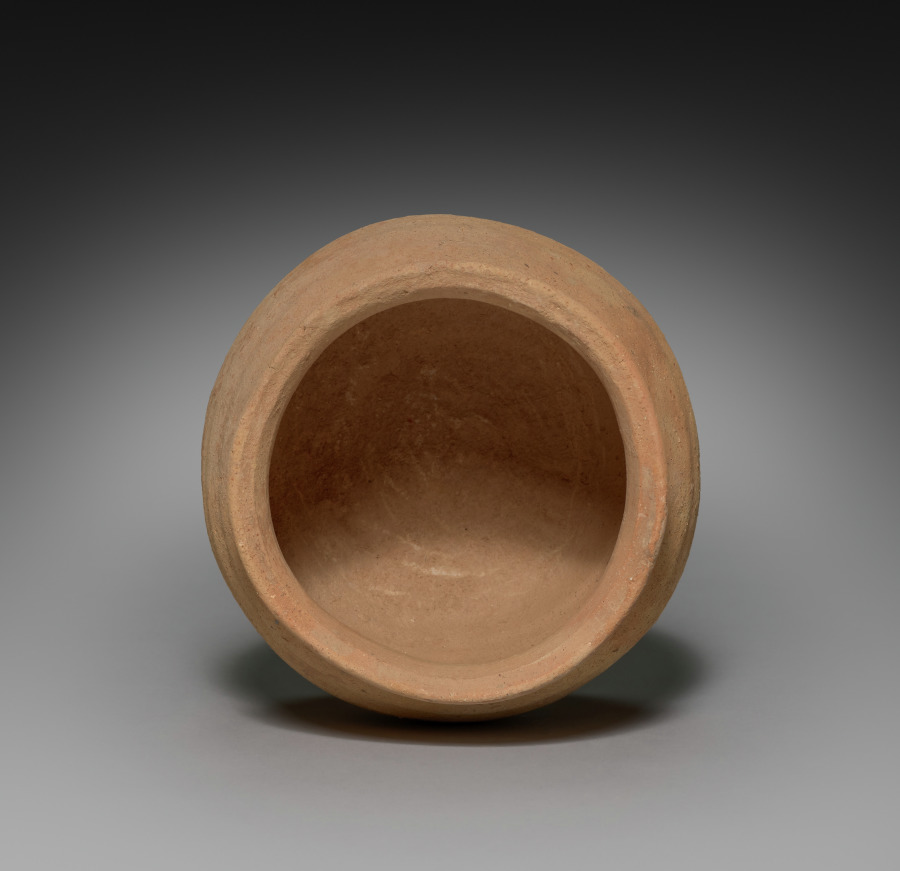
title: Covered Jar with Horn Handle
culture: Korea, Silla (57 BC-935) or Kaya (AD 42-562) period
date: 400s–500s CE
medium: red earthenware with applied red slip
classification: Ceramic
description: Early earthenware from the Three Kingdoms period (57 BCE–668) became widely utilized as agriculture and religion grew to be essential elements in sustaining society and its systems. The clay jars of different sizes and shapes on display were made for the following purposes: some were used to store harvested grains and seeds, some, especially lidded ones such as this example, to preserve cremated remains, and some to serve offerings in rituals.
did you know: Closed kilns built on hillsides became widely used for producing this type of pottery vessel in Korea during the Three Kingdoms period.